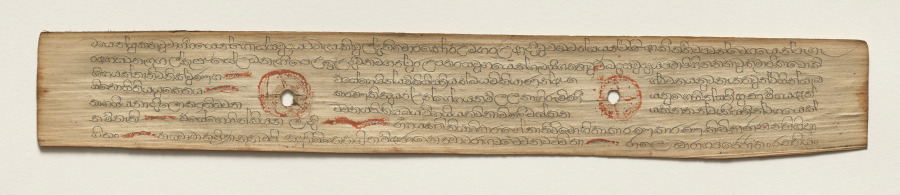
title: Leaf from a Buddhist Manuscript (verso)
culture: Sri Lanka, Singhalese, Late 17th century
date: c. 1700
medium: fiber paper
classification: Manuscript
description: Palm leaf material is still used for manuscripts in Sri Lanka. The palm leaves are prepared first by boiling them, drying them in the sun, and then rubbing them with oils. Scribes then use a metal stylus to incise the text. Then charcoal powder is wiped across the pages, filling in only the inscribed lines.